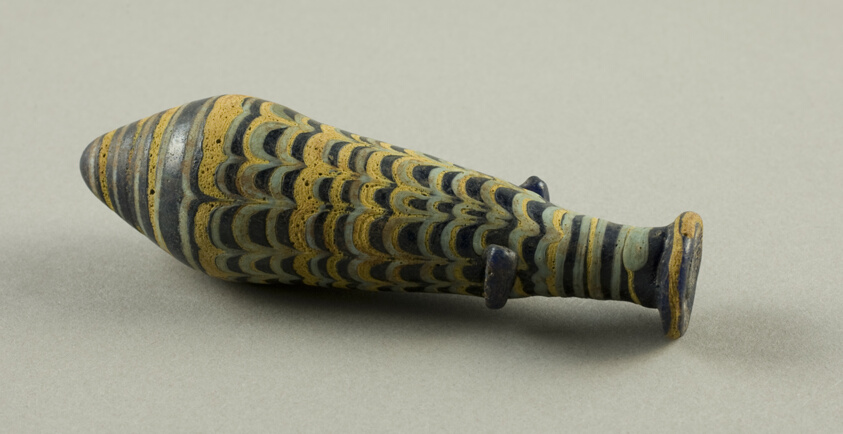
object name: Vessel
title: Alabastron (Container for Scented Oil)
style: greek, ancient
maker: Greek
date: 3rd-1st century BCE (?)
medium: Glass, core-formed technique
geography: Greece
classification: glass; vessel; ancient art